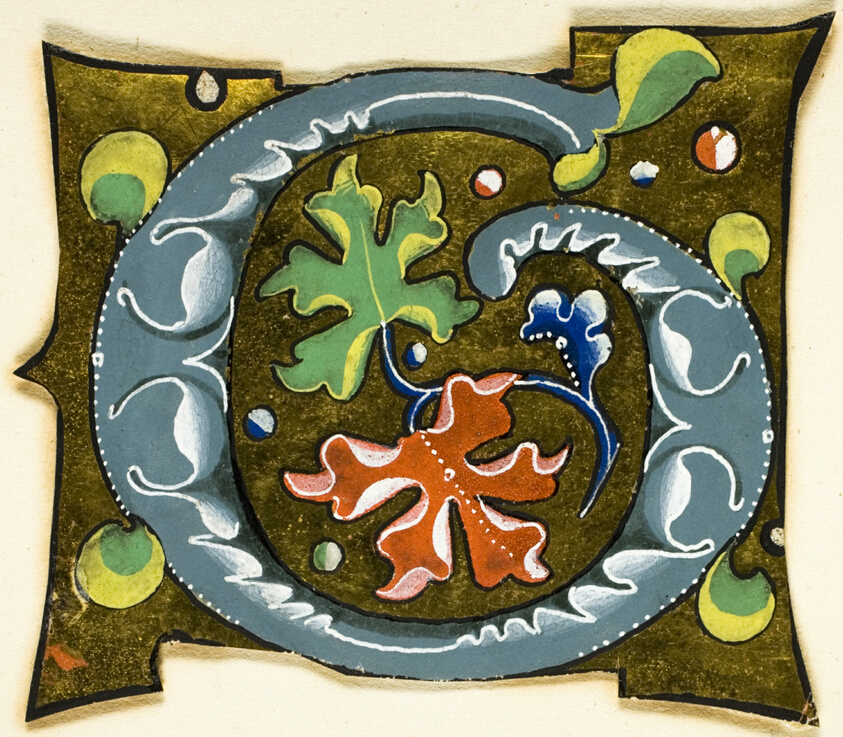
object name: Drawing and Watercolor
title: Decorated Initial "G" in Grey with Red, Green and Blue Leaves from a Manuscript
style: medieval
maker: European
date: 14th century or modern, c. 1920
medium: Manuscript cutting in tempera and gold leaf on vellum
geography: Europe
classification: tempera; manuscript; drawings (visual works); prints and drawing